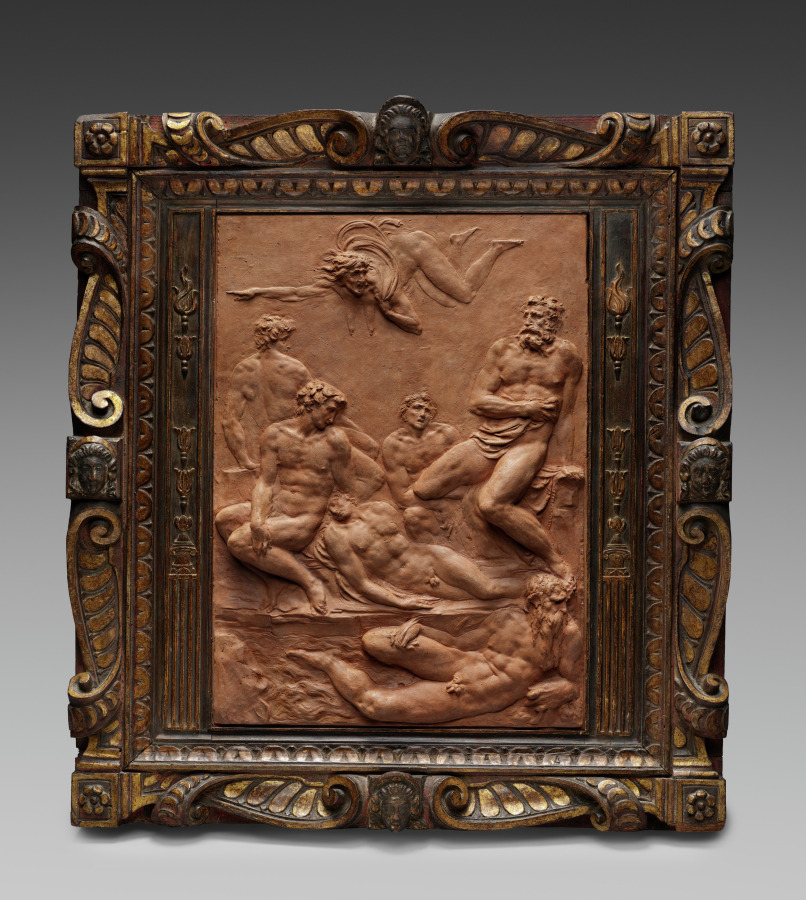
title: The Death of Count Ugolino della Gherardesca and His Sons (Inferno Canto XXXIII)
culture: Italy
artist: Pierino da Vinci (Italian, 1530–1553)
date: c. 1550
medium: Terracotta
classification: Sculpture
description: Pierino da Vinci's dramatic relief depicts a scene from a poem that was based on an actual historical event. In 1289, following a political coup in Pisa, Italy, Count Ugolino and his sons were imprisoned in a tower and left to starve; their tragic tale inspired Dante Alighieri, who featured Ugolino in the Divine Comedy, an epic narrative tracing Dante’s imagined journey through hell, purgatory, and heaven. Pierino reimagined the story, placing the despondent figures along the banks of the Pisan river and adding a monstrous flying character representing hunger.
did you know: Leonardo da Vinci’s nephew Pierino was considered the heir to his uncle’s artistic genius.